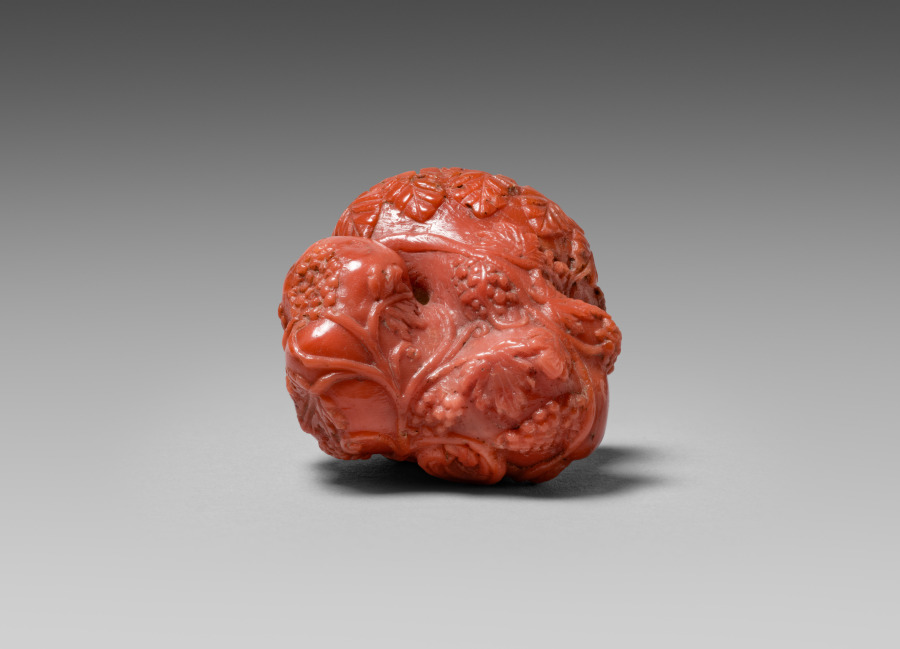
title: Sword Hilt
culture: Pakistan, Gandhara, Kushan period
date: c. 100s–200s CE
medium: coral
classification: Sculpture